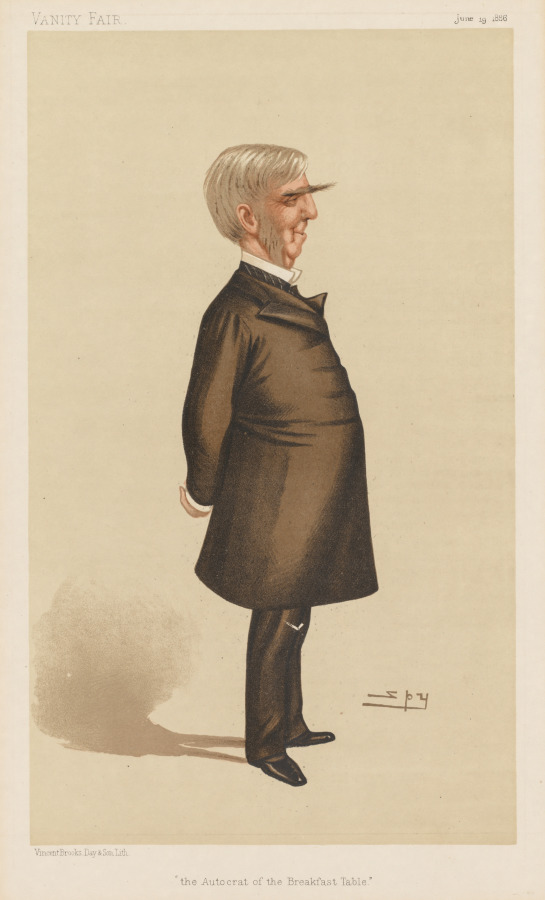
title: Vanity Fair: "The Autocrat of the Breakfast Table"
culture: England, 19th century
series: published in Vanity Fair June 19, 1886; Vanity Fair. (Boston: Frame Central, 1992.) p. 17, 19 June, 1886, M. No. 362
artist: Leslie Matthew (Spy) Ward (British, 1851–1922)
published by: Vincent Brooks Day & Son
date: 1886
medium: color lithograph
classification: Print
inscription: On mat, in graphite: Oliver Wendell Holmes; in graphite, verso: MOTD # 369 / DR. Olver Wendell Holmes